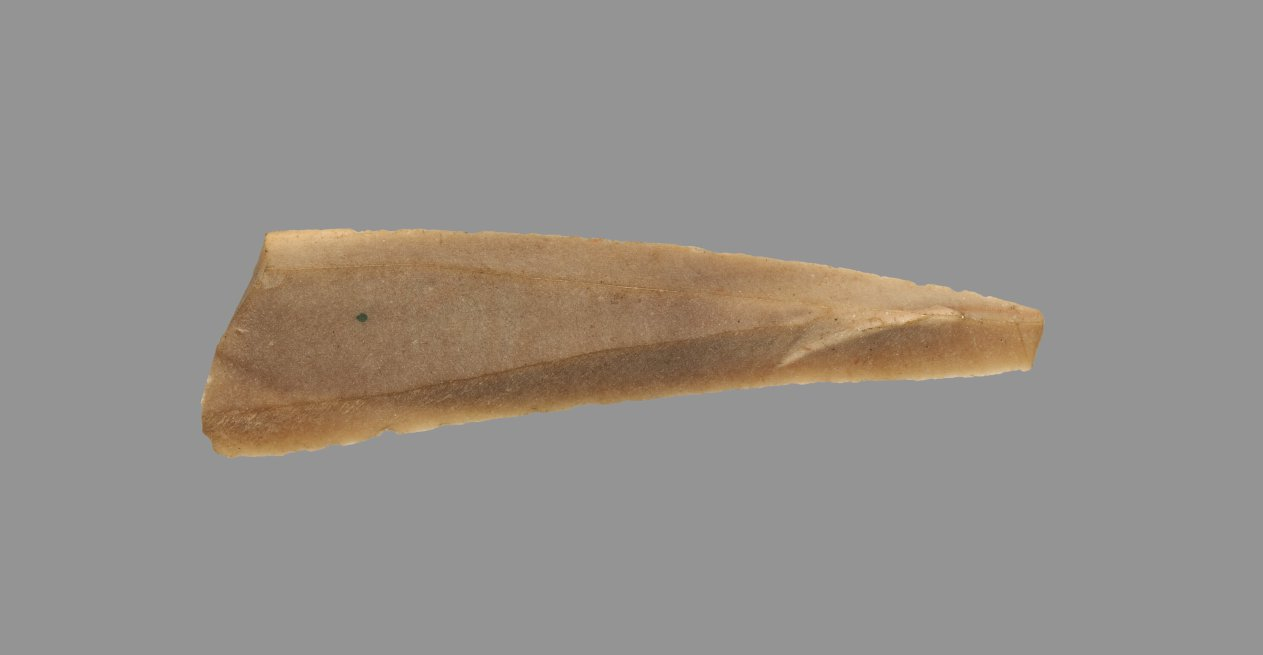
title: Sickle Blade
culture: Egypt, Middle Kingdom (2040–1648 BCE), Dynasty 12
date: 1980–1801 BCE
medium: flint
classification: Implements